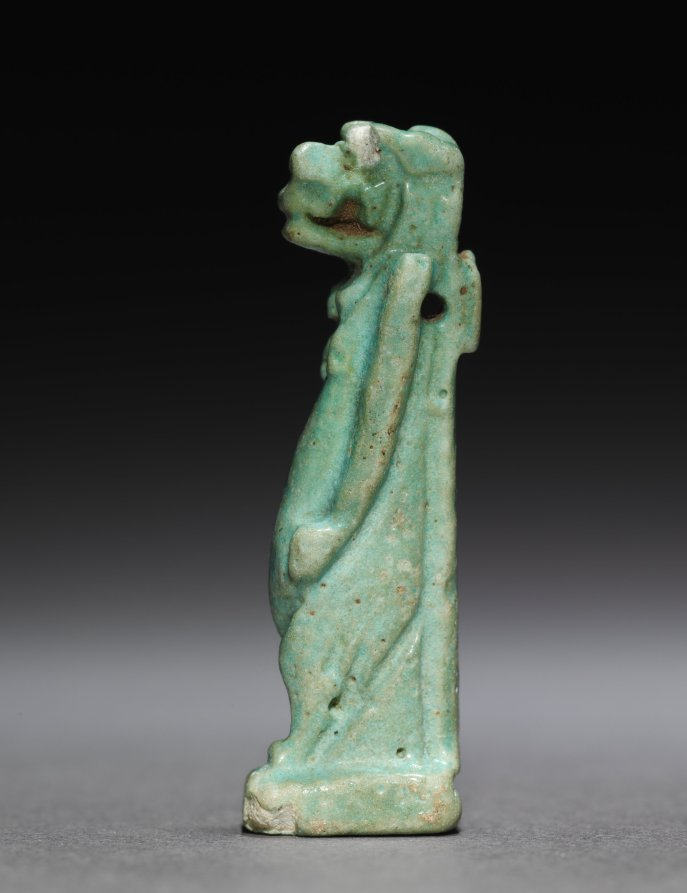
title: Amulet of Taweret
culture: Egypt, Greco-Roman period (332 BCE–395 CE), Ptolemaic dynasty (305–30 BCE)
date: 305–30 BCE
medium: light robin's egg blue faience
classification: Amulets